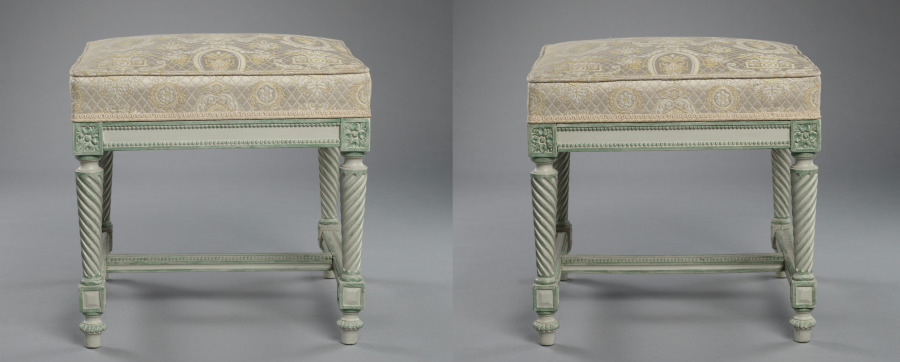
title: Stools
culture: France, Paris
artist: François-Honoré-Georges Jacob (French, 1770–1841)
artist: Georges Jacob (French, 1739–1814)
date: 1805–1813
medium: painted walnut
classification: Furniture and woodwork